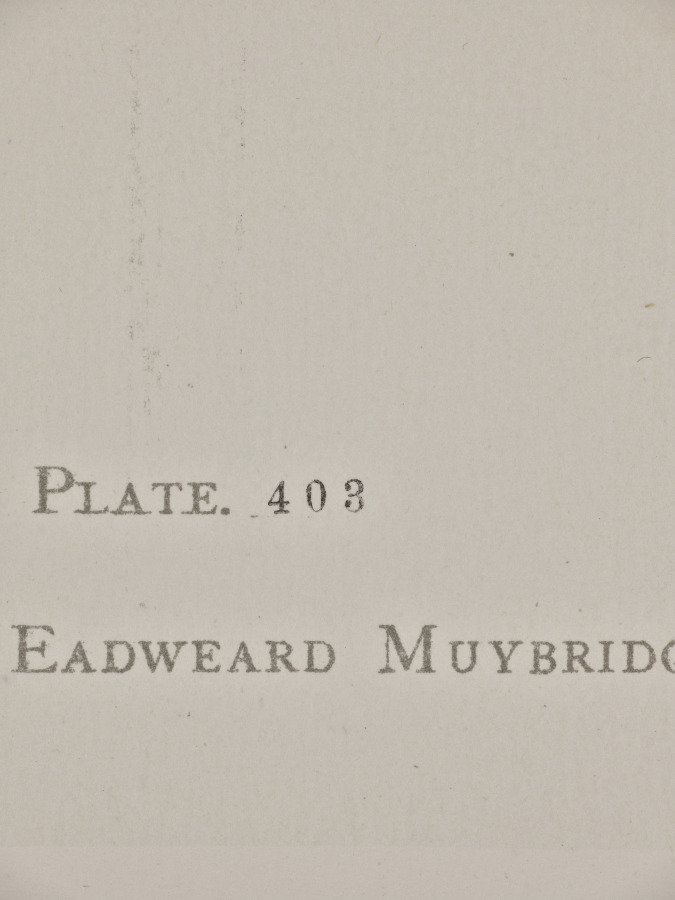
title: Emptying a Bucket of Water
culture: America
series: Animal Locomotion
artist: Eadweard J. Muybridge (American, 1830–1904)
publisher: University of Pennsylvania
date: 1887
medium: collotype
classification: Photograph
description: Eadweard J. Muybridge initially used horses to capture motion as separate slices of time faster than the human eye could perceive them, then moved on to study other animal and human movements. Everyday activities, like emptying a bucket of water, were broken down and sequenced back-to-back. This series was commissioned by the University of Pennsylvania and intended to diagnose dysfunction in human movement by allowing each consecutive action to be studied in isolation. The university’s desire for distribution called for the use of collotype. The process had been recently improved to the point where editions of up to 1,000 were possible, making it an attractive option for publishers.